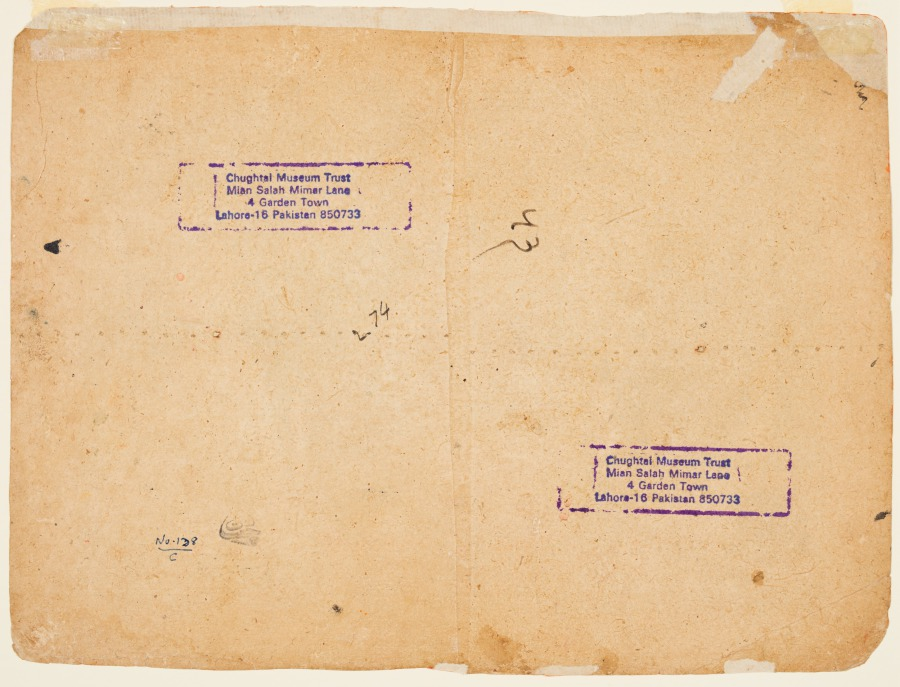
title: Raja Bikram Singh of Guler smoking a hookah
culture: Northern India, Pahari kingdoms, Himachal Pradesh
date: c. 1678–90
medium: gum tempera, ink, and gold on paper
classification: Painting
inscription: gulerīyā rāja bikrama siṃgha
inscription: On Verso Devanāgari numerals: 53 Arabic numerals: 2.74 English notation: No.138 C Two purple ink stamps: Chughtai Museum Trust Mian Salah Mimar Lane 4 Garden Town Lahore-16 Pakistan 850733 Single black stamp in Urdū: Chughtai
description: The portrait of Raja Bikram Singh is the earliest depiction of a Guler chief and was produced in Chamba, possibly under the patronage of Raja Chattar Singh (r. 1664–90). The painting bears several features of early portraiture in Chamba—a straight Hookah pipe, striped trousers, large bolsters, and the sitting posture of the raja.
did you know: Raja Bikram Singh was famed for his physical strength and could break a coconut into pieces with his fingers